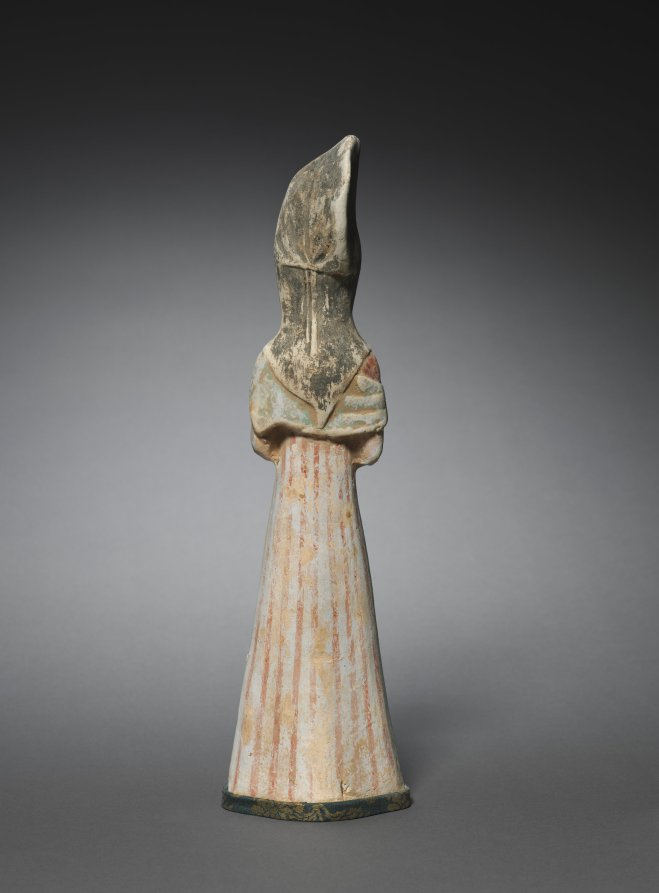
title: Court Lady with Tall Headdress: Tomb Figurine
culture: North China, Tang dynasty (618-907)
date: c. 700–750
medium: earthenware with polychromy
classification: Sculpture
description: There was prosperity and flourishing culture in the Tang dynasty. Their capital was at Chang’an, which is present-day Xi’an. There was great interaction with other cultures through trade, diplomacy, and artistic exchange along the Silk Road. Archaeological discoveries of earthenware figures, like this slender woman with a tall headdress, give a vivid picture of everyday life in 8th-century China. Aristocratic women had a high degree of freedom during the Tang dynasty, especially in contrast with the Neo-Confucianism of the later Song dynasty. Women were well educated and active; paintings exist of Tang women riding horses and participating in hunts and warfare, in addition to doing more courtly, traditionally feminine activities like dancing or making music.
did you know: Earthenware figurines like this one were placed in the tombs to accompany the deceased to the afterlife.